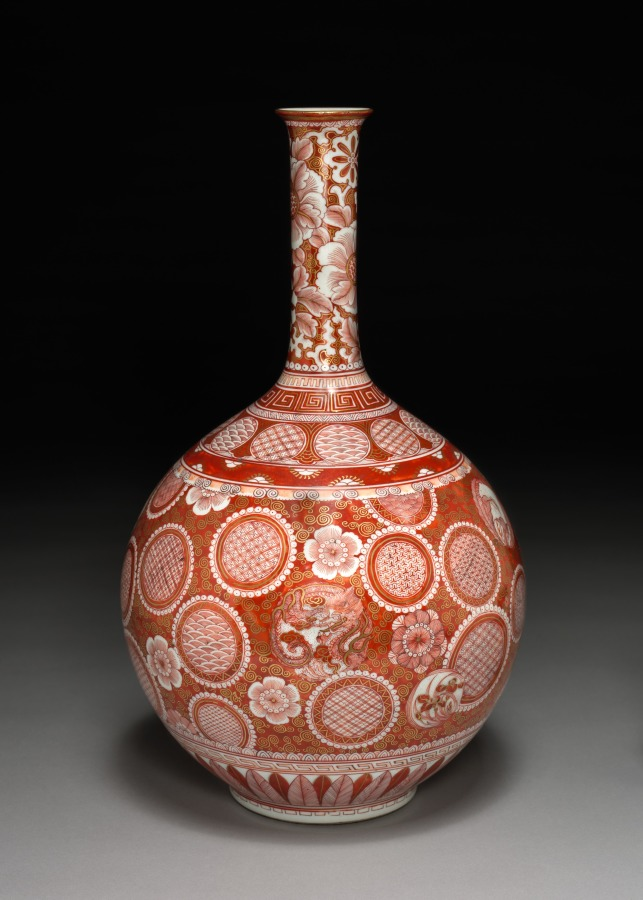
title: Vase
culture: Japan, Edo period (1615–1868)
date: early to mid-1800s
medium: porcelain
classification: Ceramic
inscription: on the base in red are "FUKU" (happiness) in a square and "ICHI-KA" in a fish.